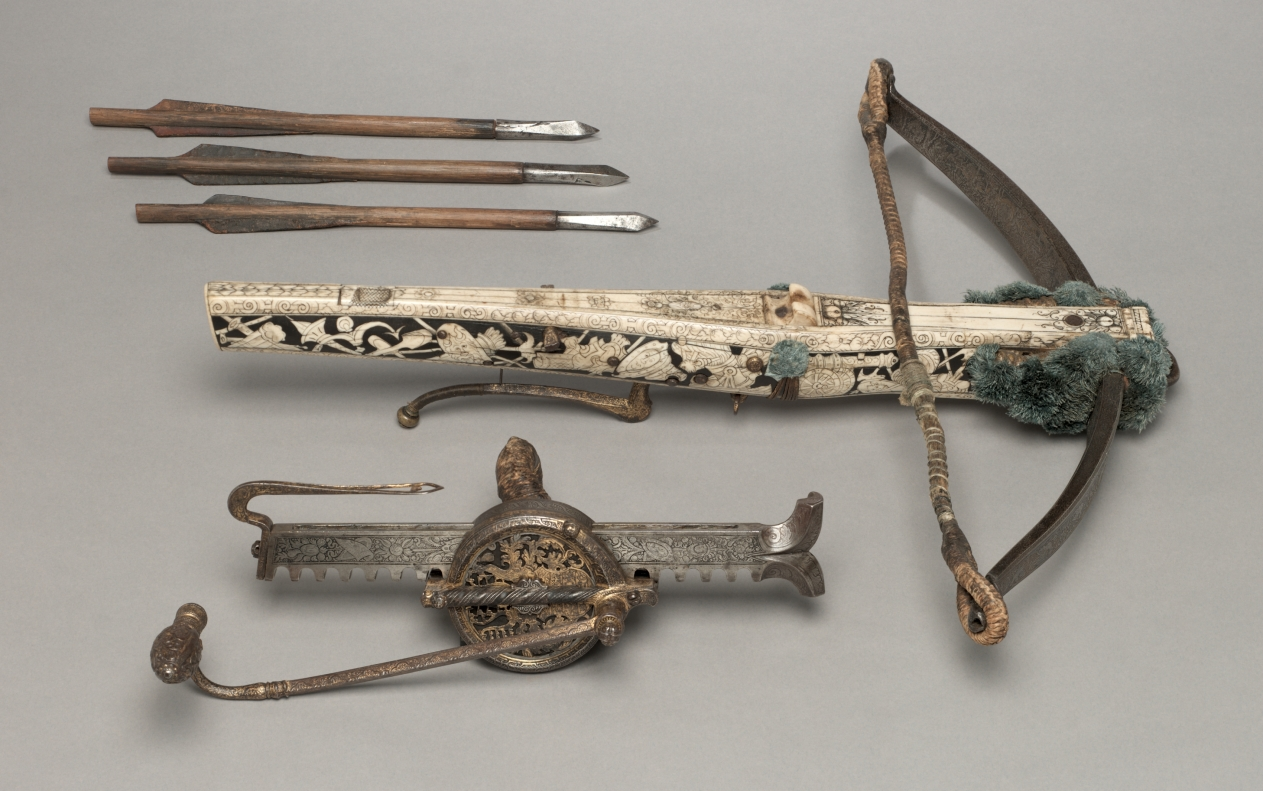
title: Crossbow Bolt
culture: Germany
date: 1500s–1600s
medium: wood, leather, steel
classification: Arms and Armor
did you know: Bolts with leather feathering were used mainly in the Tyrolean area, which includes northern Italy and western Austria.